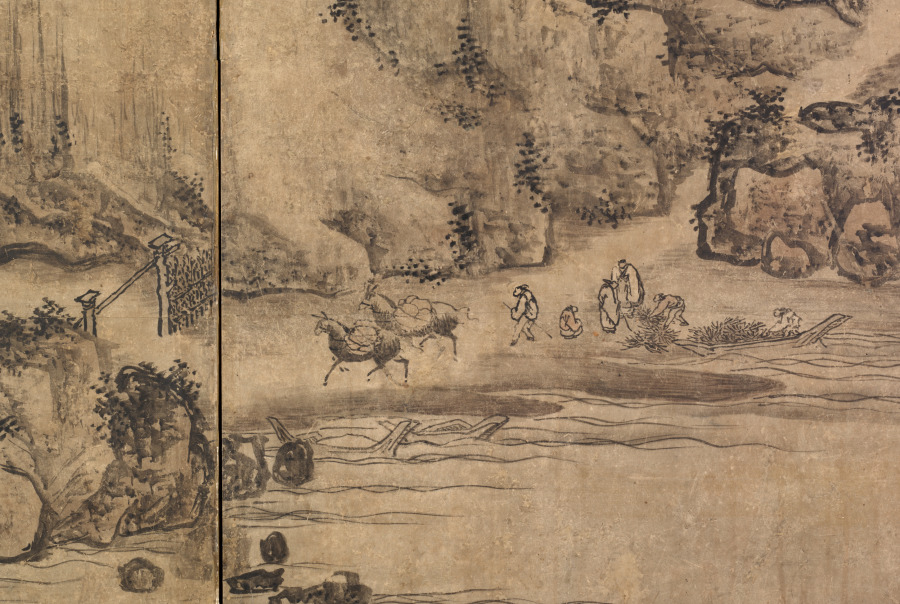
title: Landscape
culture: Japan, Muromachi period (1392–1573)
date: 1550–99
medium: One of a pair of six-panel folding screens; ink and color on paper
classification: Painting